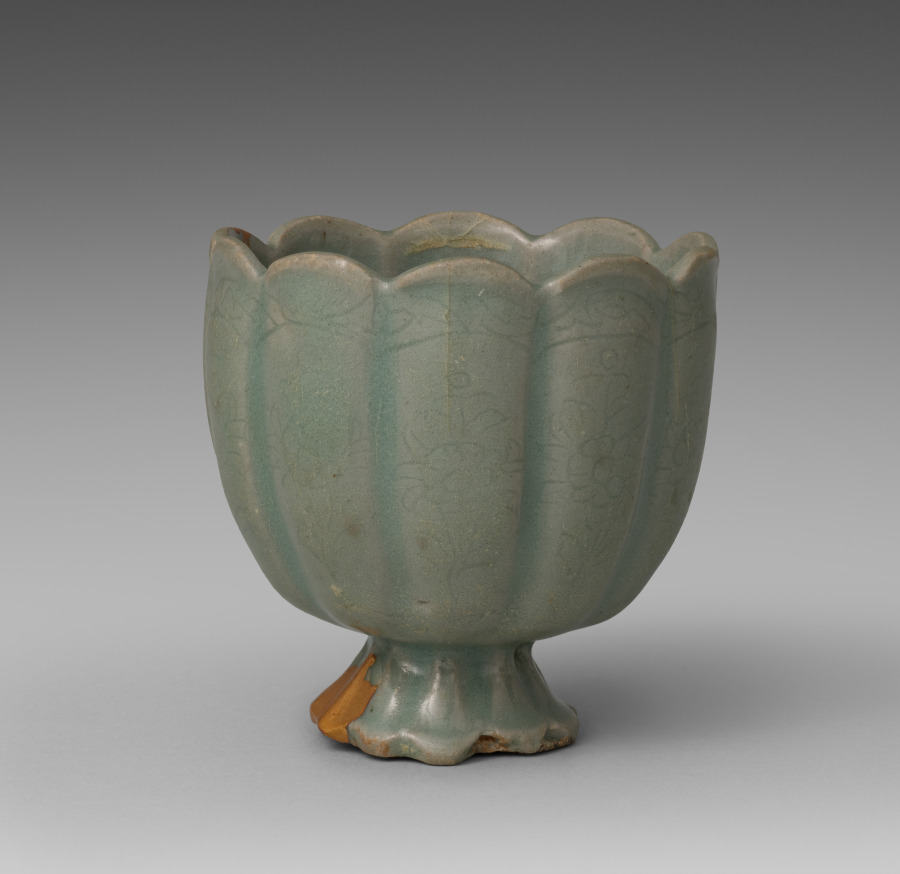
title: Floral-shaped Cup with Incised Chrysanthemum Design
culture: Korea, Goryeo dynasty (918–1392)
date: 1100s-1200s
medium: celadon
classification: Ceramic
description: Both everyday objects and ornaments such as this drinking cup were standard for Goryeo period (918–1392) burial goods. Furnishing tombs with an elaborate assemblage of objects was believed to honor and comfort the newly dead. While greenish celadon works were mainstream during the Goryeo period, bluish-white ceramic works made of white clay such as this one were produced from time to time.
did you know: Called kintsugi (literally meaning “gold joinery”) in Japanese, this method of repairing broken parts with glittering gold mixed with lacquer was extensively used for ceramic works in the Goryeo period, such as this cup.